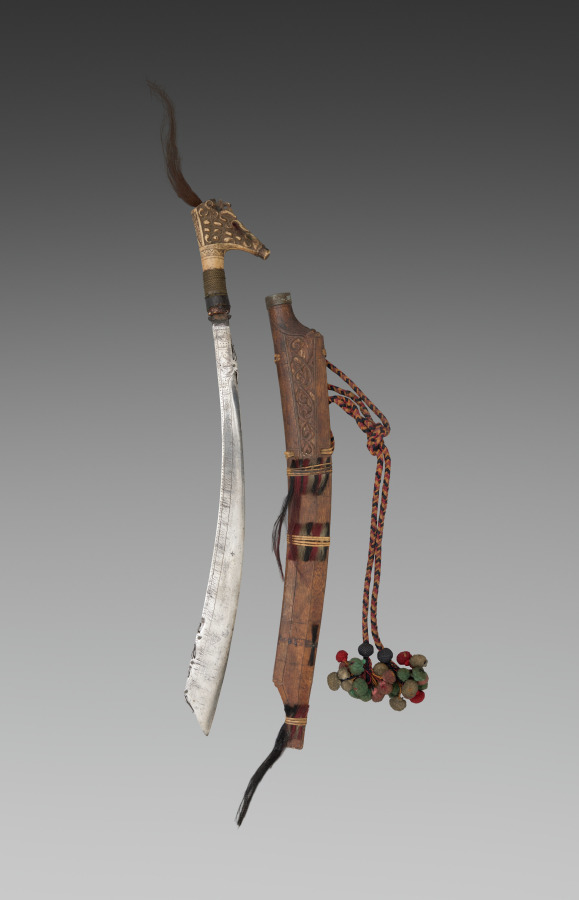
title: Knife (Mandau) and scabbard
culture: Indonesia, Borneo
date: c. 1900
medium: metal, wood, bone, hair, and braided cloth cord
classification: Arms and Armor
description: Both a work of art and a weapon, blades of this type with elaborately carved and plumed hilts were used mainly by the Dyak people of Kalimantan, on the Indonesian Island of Borneo.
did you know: Borneo is the third largest island in the world.